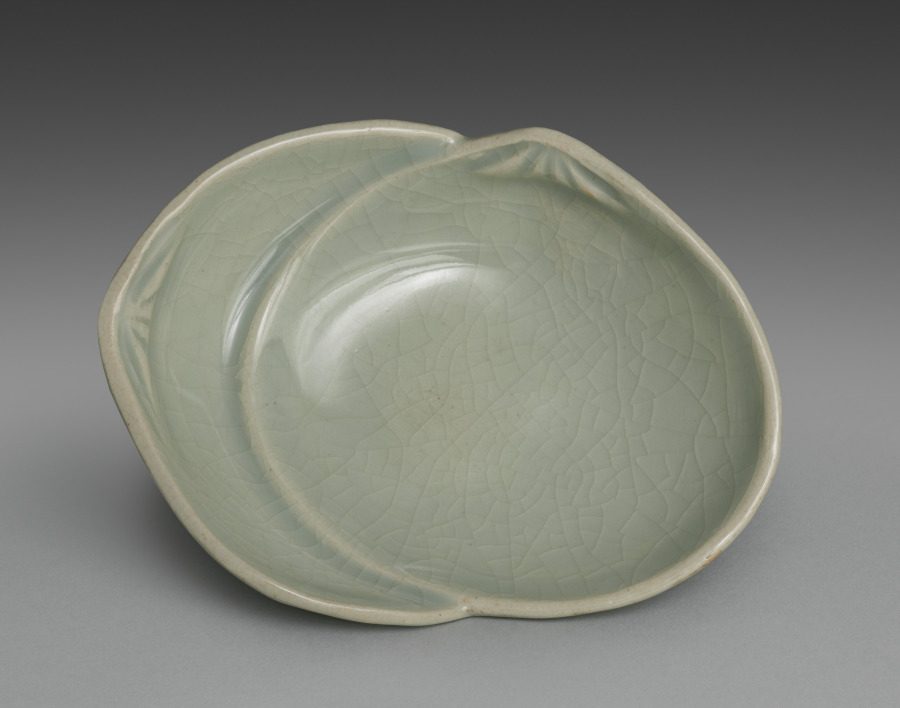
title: Dish from Dishes with Matching Shells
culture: Japan, Meiji period (1868–1912)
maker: Seifū Yohei III (Japanese, 1851–1914)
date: 1893–1914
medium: One of a pair of dishes; porcelain with celadon glaze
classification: Ceramic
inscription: 清風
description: Yohei III’s main output for his sophisticated clientele was in the form of tea sets and dining sets. He created a range of dishes in green glazes. He often produced in pairs, sets of five, or sets of ten. This pair of shell dishes have a box lid interior attestation by Yohei IV that the dishes were made by Yohei III with a cracked-ice (hyōretsu) pattern in the glaze, omitting reference to any glaze coloration.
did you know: These shell-shaped dishes are of the saucer type, suitable for dipping sauces.